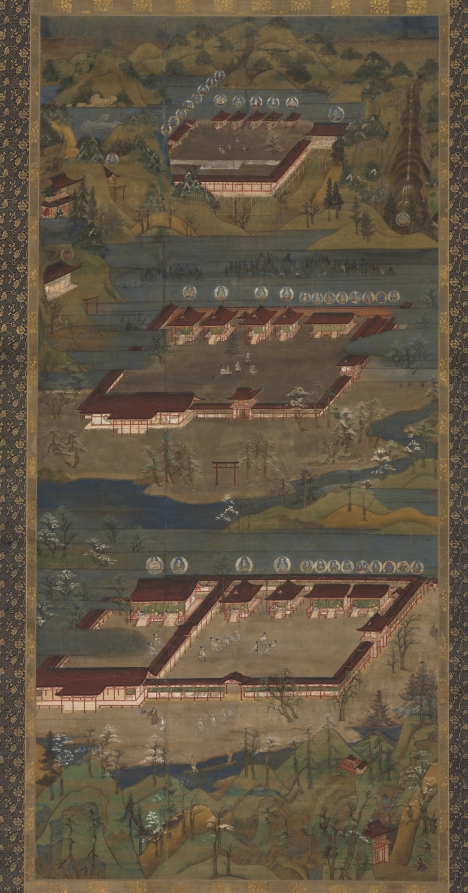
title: Mandala of the Three Shrines at Kumano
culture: Japan, Kamakura period (1185–1333) to Nanbokuchō period (1336–92)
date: 1300s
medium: hanging scroll; ink and color on silk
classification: Painting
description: This painting depicts the three shrines of Kumano from a bird’s-eye perspective, with the Buddhist counterparts of the kami of each shrine hall shown in discs directly above the halls. It also features figures, both pilgrims and deities, along the pilgrimage route and at the shrines. It is the only surviving work illustrating architectural representations of all three shrines in the same painting. They are compressed into a stacked composition, with the Nachi shrine at the top, the Shingū in the middle, and the Hongū at the bottom.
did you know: The sacred waterfall at the top right of the painting is called Nachi.